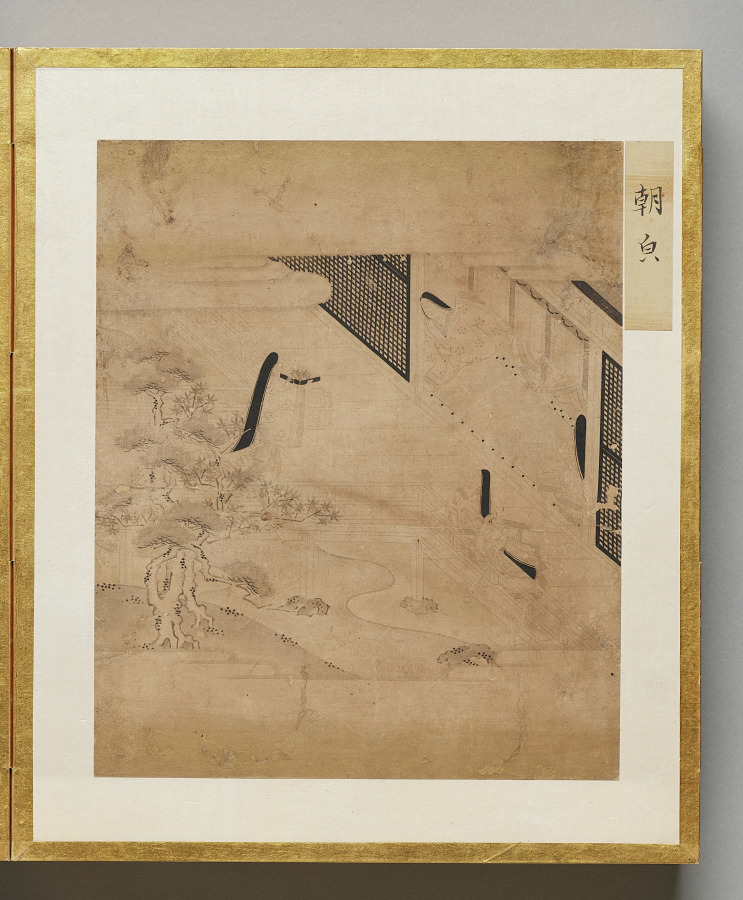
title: Morning Glory from Album of Illustrations for the Tale of Genji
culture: Japan, Edo period (1615–1868)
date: 1600s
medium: painting in an accordion-style album; ink, light color, and gold on paper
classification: Bound Volume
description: This album contains illustrations for the classic literary work the Tale of Genji, authored in the 1000s by Murasaki Shikibu, an aristocrat of the Heian period (794–1185) court. The scenes are painted in the “white drawing” (hakubyō) mode, in which a fine ink line is used to depict figures and spaces with great subtlety, punctuated only occasionally by traces of red pigment for a character’s lips, a detail of a garment, or a decorative element. These two scenes illustrate episodes from the chapters “Thin Veil of Cloud” (Usugumo) and “Barrier Gate” (Sekiya).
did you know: The illustrations are identified by chapter title in cartouches to the upper right of the paintings.